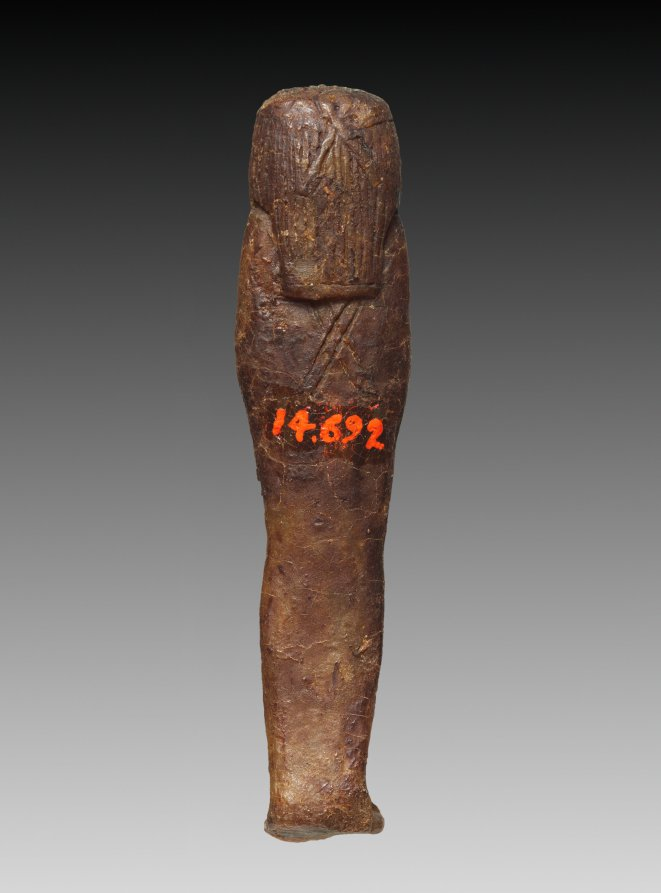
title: Son of Horus: Imsety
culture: Egypt, Third Intermediate (1069–715 BCE), Dynasties 21–22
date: 1000–900 BCE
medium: wax with dark amber varnish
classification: Funerary Equipment